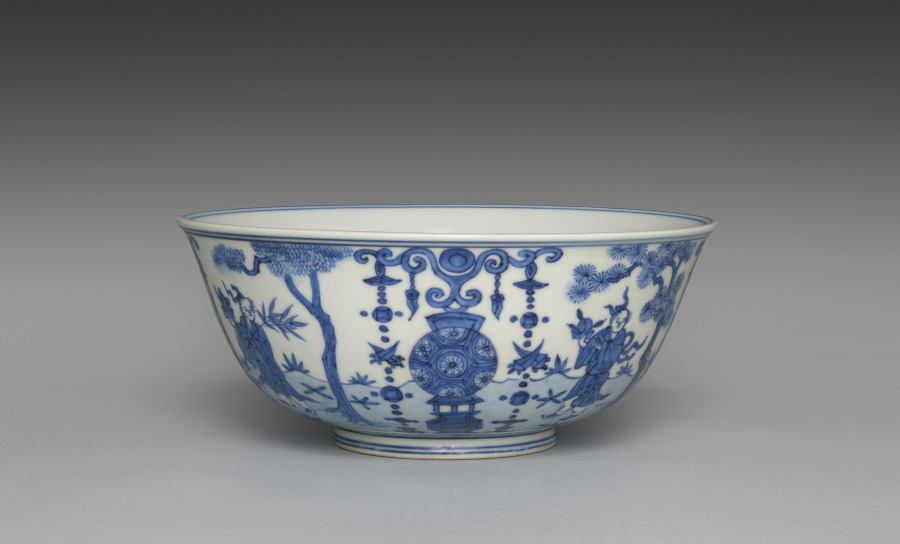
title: Bowl from Nesting Bowls with Daoist Immortals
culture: Japan, Meiji period (1868–1912)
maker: Seifū Yohei III (Japanese, 1851–1914)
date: 1893–1914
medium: Inner bowl from a set of three bowls; porcelain with underglaze blue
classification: Ceramic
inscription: 大日本清風造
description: Yohei III was capable of ink painting–like compositions in underglaze blue, as well as more decorative ones like that on this set of three nesting bowls. Bowls with very similar designs in five colors were produced in the reign of the Wanli emperor (reigned 1572–1620) during the Ming dynasty, and Yohei must have had direct access to one of these or to a close copy. A scene of Daoist immortals is presented on the bowls. On each one, the ground plane is defined with a blue wash. Four lanterns are evenly spaced around the bowl. Two are flanked with linked-piece metalwork banners of the seven treasures. The alternate altars are adorned with textile banners. In between them are four immortals, each standing beneath a tree with small plants surrounding his feet. Two of the immortals hold fruit on a tray. Another carries an elixir-filled ewer and a willow branch. The fourth holds a swastika (manji), here an auspicious symbol, and a flower. Curiously, the inscription inside each footring reads “Made by Seifu of Great Japan,” in emulation of the dynasty and reign inscriptions that appear on Chinese ceramics; however, one can also see through the translucent glaze another inscription, “Seifu Yohei,” written in large characters within a double band of blue on the largest bowl.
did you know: In the bottom of each bowl is a scene of two robed immortals who appear to stand on a precipice in a mountainous landscape high in the clouds, with celestial orbs over their heads.